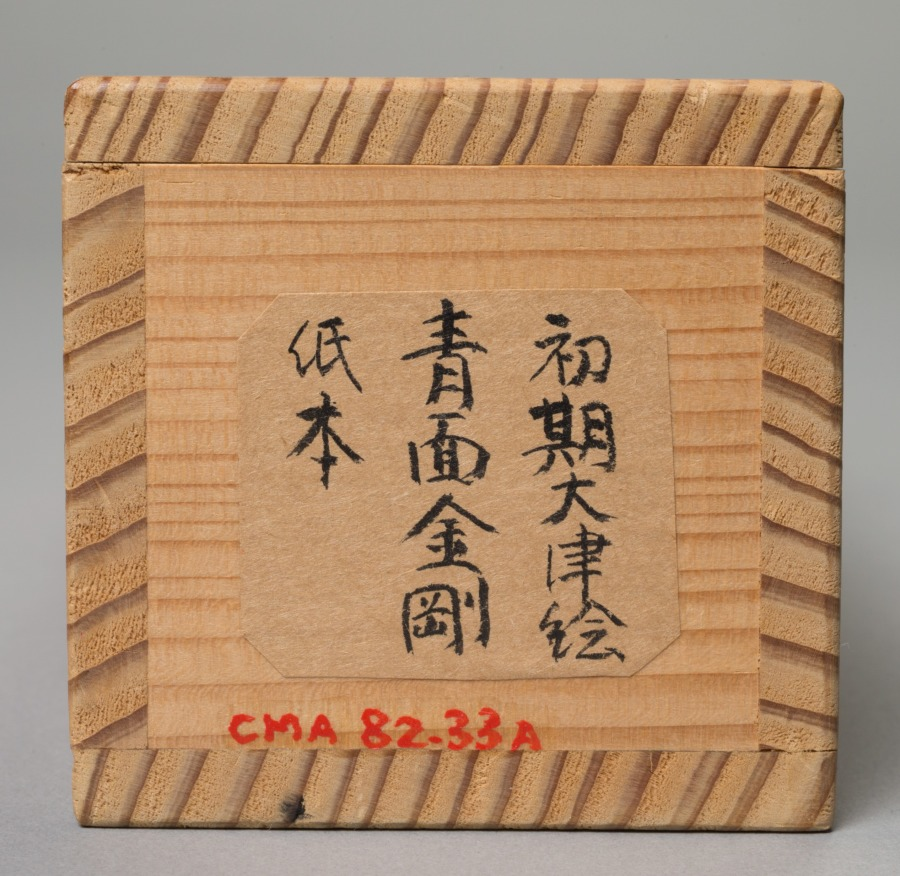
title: Shomen Kongo: The Blue-Faced Kongo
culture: Japan, Edo period (1615–1868)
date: 1615–99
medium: hanging scroll; ink and color on paper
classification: Painting